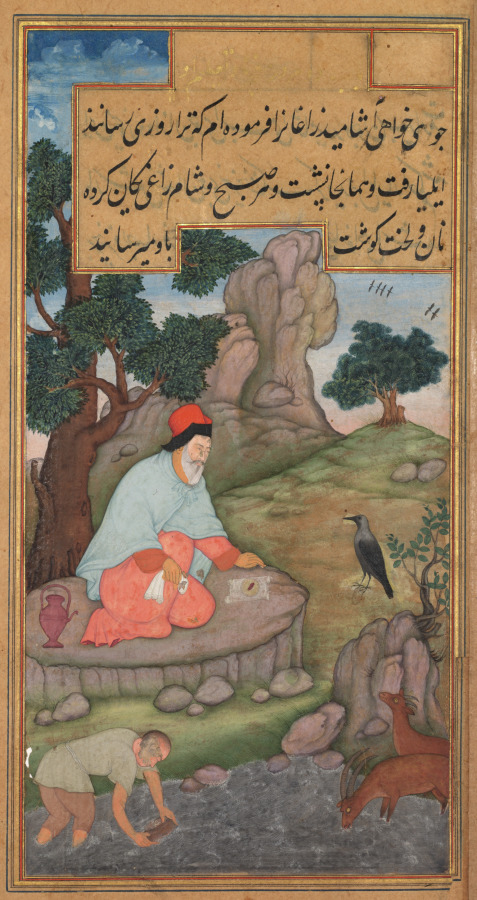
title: A raven brings food to Elijah (folio 72 recto), from a Mirror of Holiness (Mir’at al-quds) of Father Jerome Xavier,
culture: Mughal India, Allahabad, made for Prince Salim (1569–1627)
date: 1602–4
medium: Gum tempera, ink, color, and gold on paper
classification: Manuscript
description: The Old Testament prophet Elijah sits like an Indian holy man on a raised rocky platform under a tree. A raven has come to bring him bread and meat until the river runs dry, as commanded by God. Father Jerome recounted the story of Elijah to explain a reference made by Jesus in the context of his being rejected by the people of Nazareth, where he grew up. The unusual combination of Elijah’s salmon pink and light blue garments draws the viewer’s attention to him as the focus of the composition and echoes the paler hues of the sky.